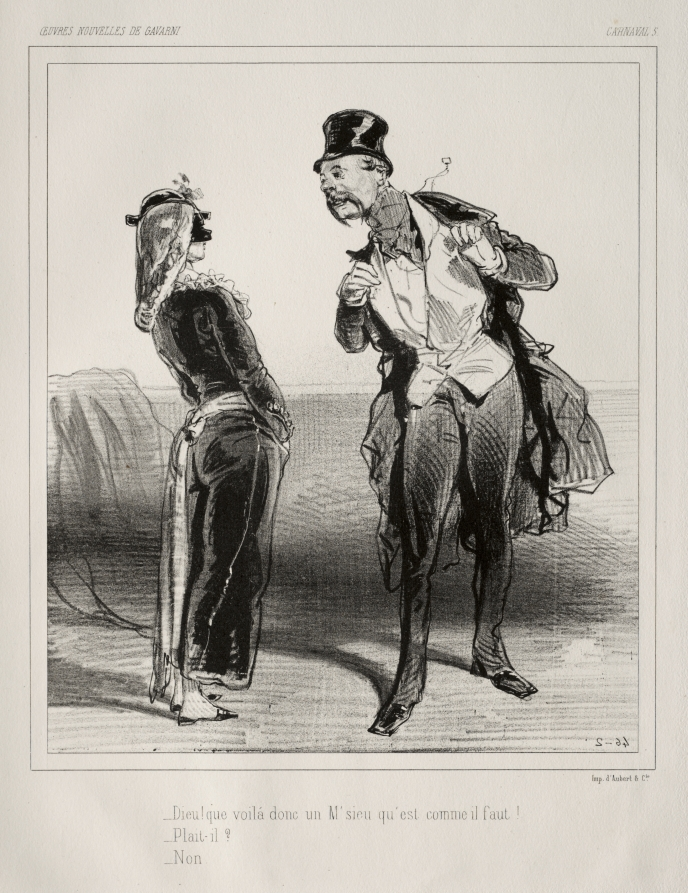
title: Carnaval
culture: France, 19th century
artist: Paul Gavarni (French, 1804–1866)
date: c. 1841–47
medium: lithograph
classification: Print